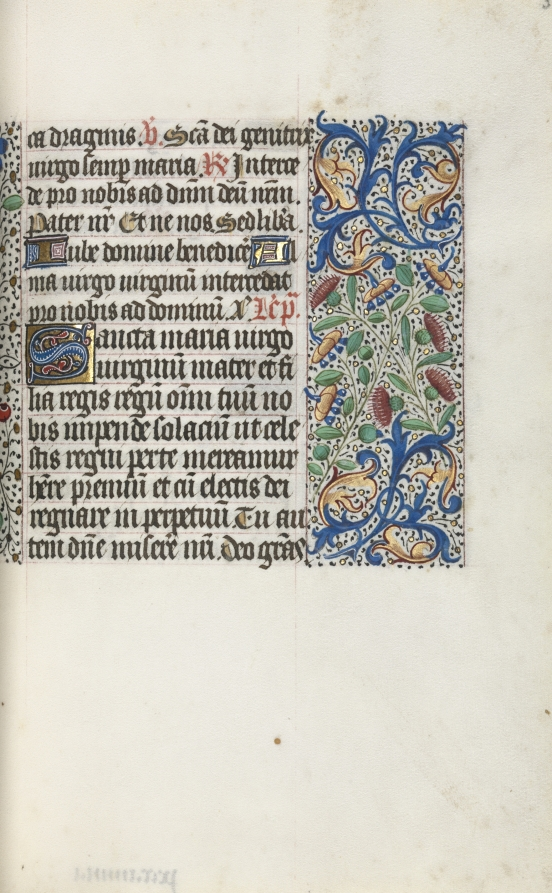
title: Book of Hours (Use of Rouen): fol. 35r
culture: France, Rouen, 15th century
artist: Master of the Geneva Latini (French, active Rouen, 1460–80)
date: c. 1470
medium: ink, tempera, and gold on vellum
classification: Bound Volume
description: In the late 1400s and early 1500s Rouen was an established and important center of book production. The city’s cathedral had a wealthy chapter that spent large sums of money to commission books and to maintain its extensive library. The stationers and booksellers would have likely been concentrated in or near the cathedral precinct. This artist, named after a manuscript now in Geneva, was Rouen’s principal illuminator during the second half of the 1400s.